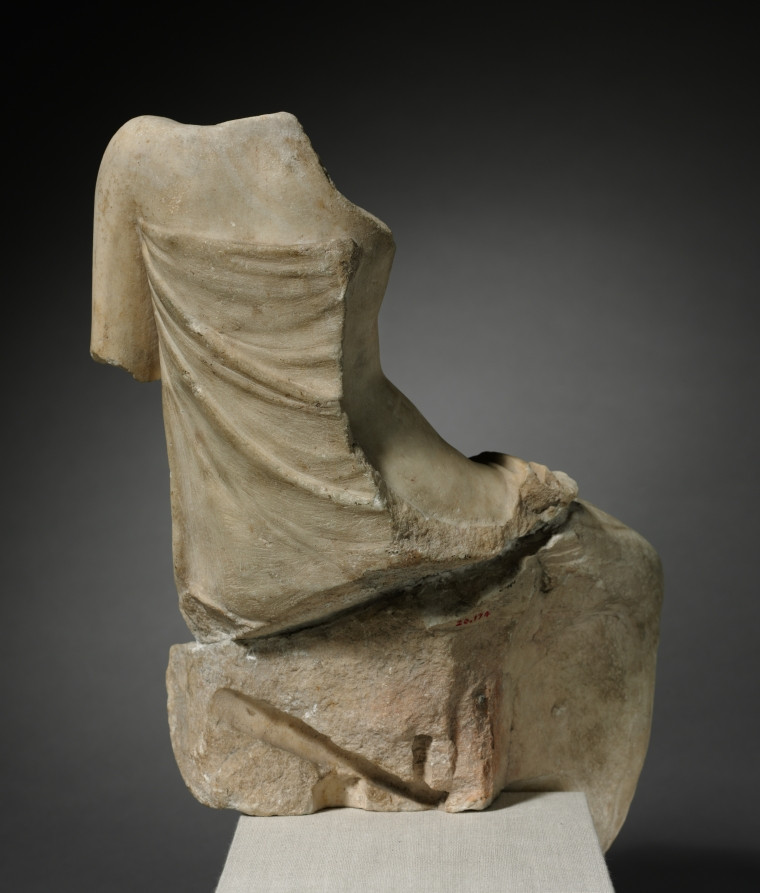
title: Seated Figure of a Woman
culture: Italy, Roman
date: 1–200 CE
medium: marble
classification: Sculpture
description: Although the original subject of this ancient Roman statue fragment is unknown, the cut stone at the back of its base indicates that the statue rested on a ledge, probably incorporated into a larger sculptural group. The nude upper body and relaxed pose suggest an alluring mythical woman, like Venus or a nymph, a beautiful female spirit that embodies elements of nature such as water, woods, or mountains.